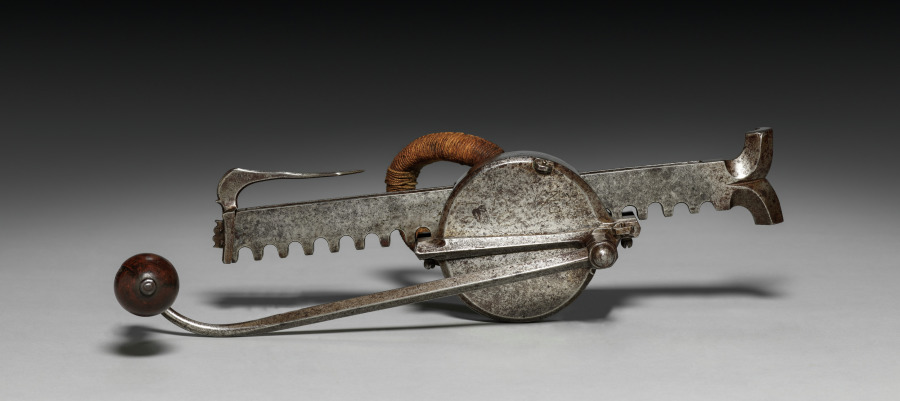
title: Cranequin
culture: Germany, Nuremberg (?), 16th century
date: c. 1580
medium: steel, flax cord, wooden handle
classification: Arms and Armor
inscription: gear case inscribed with later owner's name: CW Siball, 1665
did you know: The maker's mark says HW and may belong to Hans Wirsing, a craftsman from Nuremburg.